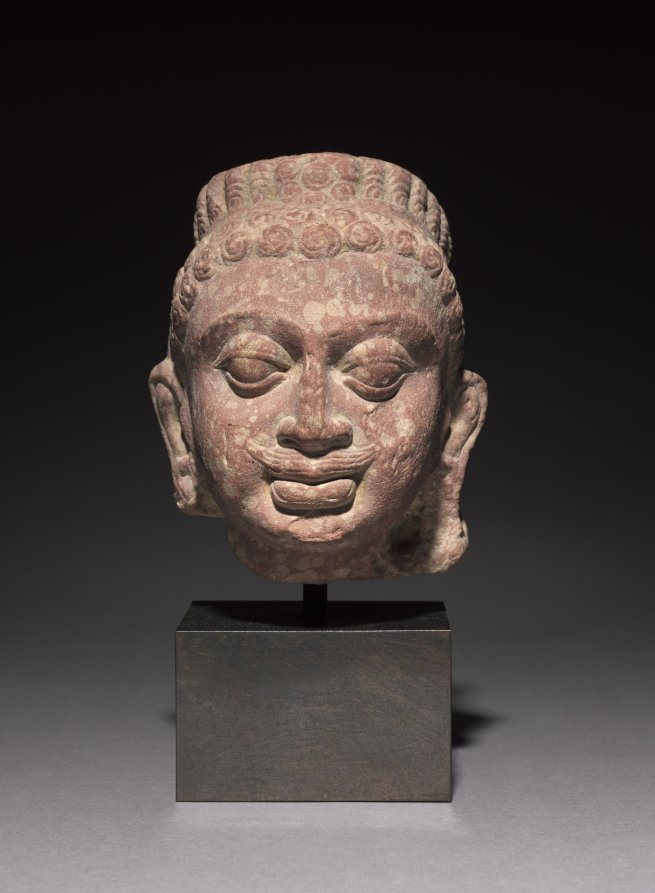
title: Head of Kubera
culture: Northern India, Mathura, Kushan period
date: 200s CE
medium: spotted red sandstone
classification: Sculpture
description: Kubera is the god of wealth, and he is most often depicted with a moustache during this period.